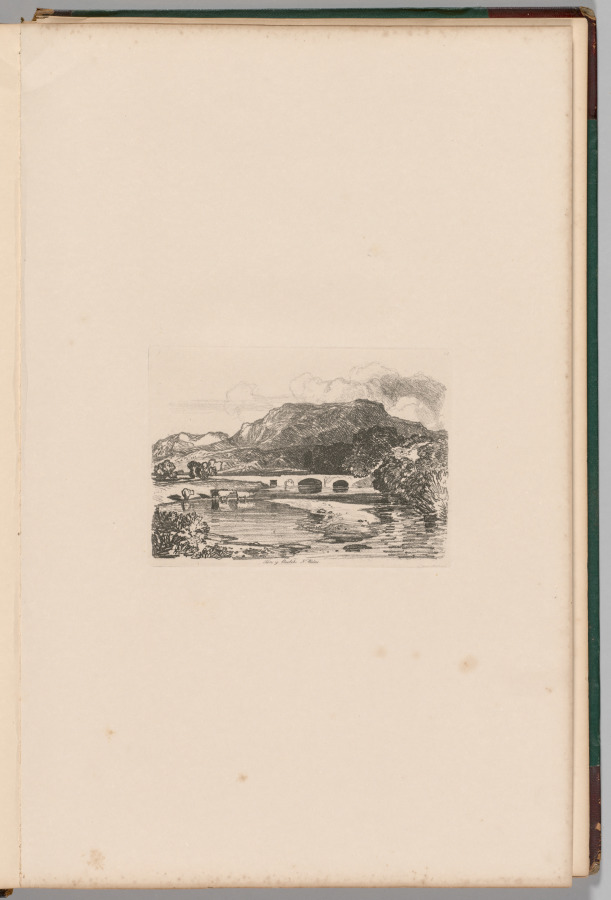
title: Liber Studiorum: Plate 14, Tan-y-Bwlch, Merionethshire, North Wales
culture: England, 19th century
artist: John Sell Cotman (British, 1782–1842)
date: 1838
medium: softground etching, from a bound volume containing 48 plates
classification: Bound Volume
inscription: In plate, within image, upper right: 14; in plate, below image: Tan-y-Bwlch, N. Wales